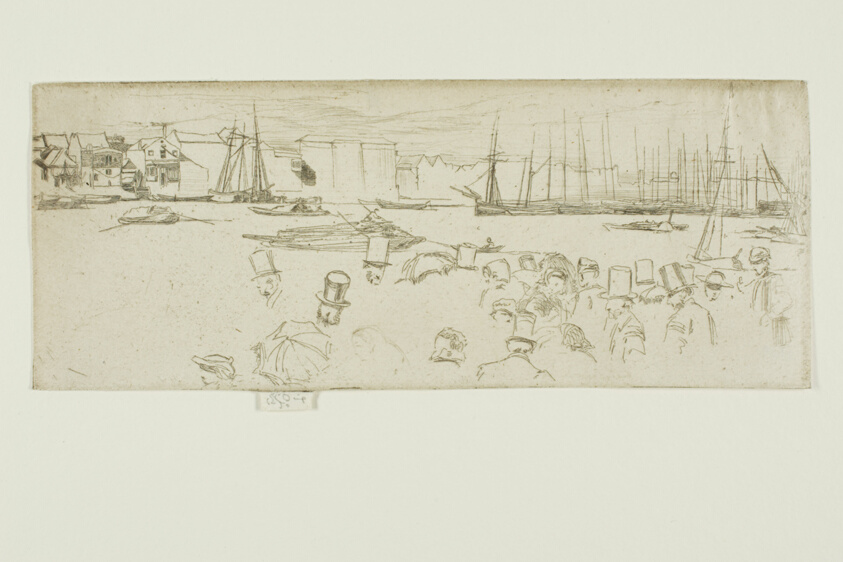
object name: Print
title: Penny Passengers, Limehouse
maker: James McNeill Whistler (American, 1834-1903)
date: 1860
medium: Etching and drypoint with foul biting in dark brown ink on ivory laid paper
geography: United States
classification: etching; foul biting; print; prints and drawing; drypoint; paper